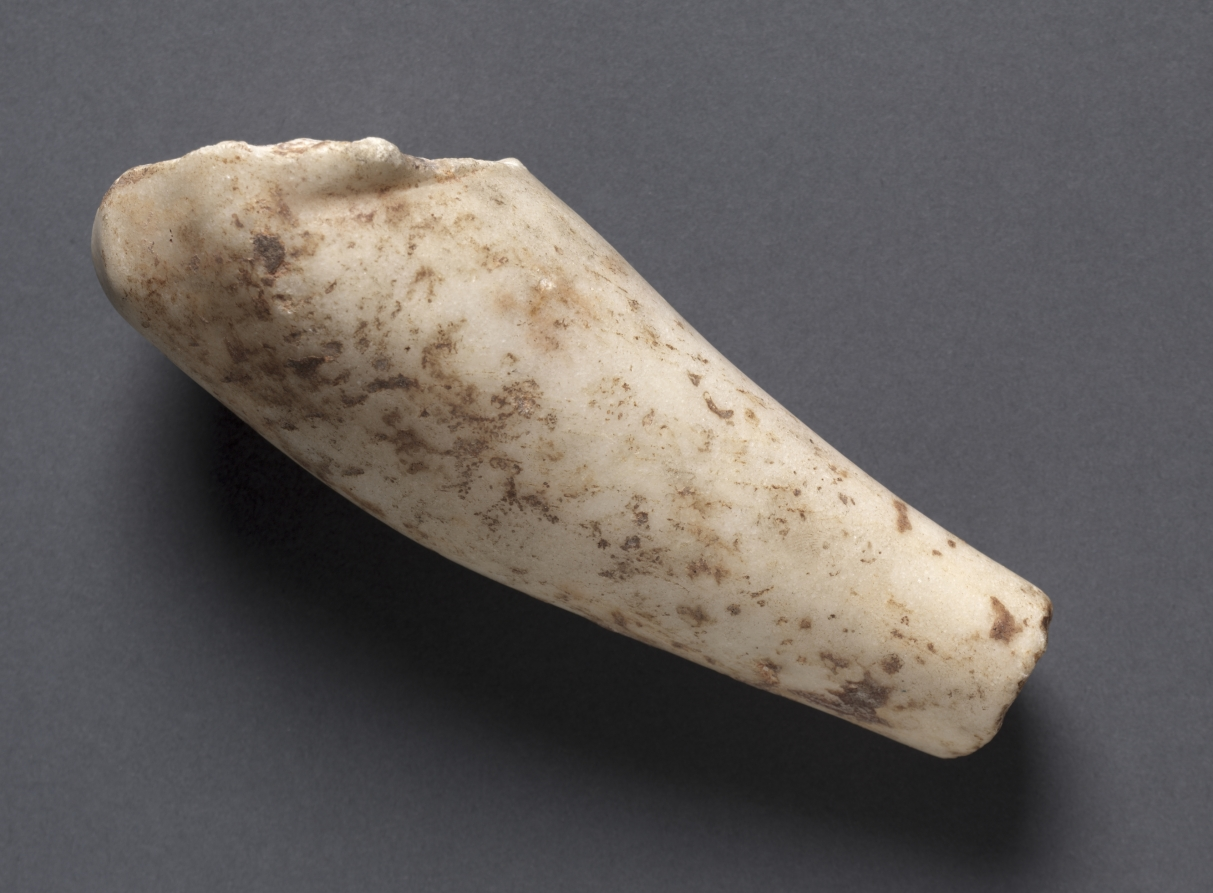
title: Fragment sent with "Dancing Lady": Small Section of a Forearm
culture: Greece, Alexandria(?)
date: c. 50 BCE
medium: marble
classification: Sculpture